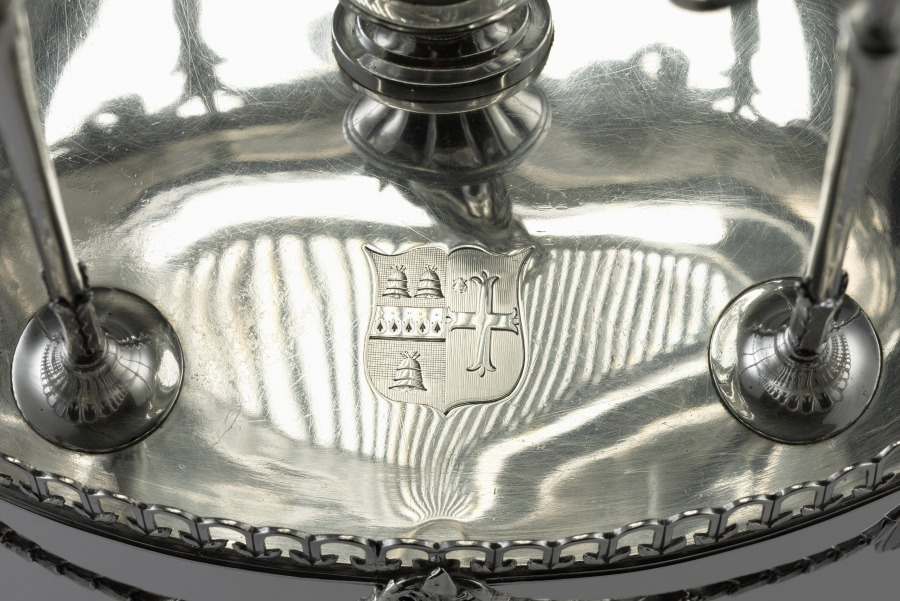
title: Centerpiece (metal stand and glass bowl)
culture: England, 18th century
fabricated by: William Pitts (British)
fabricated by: Joseph Preedy (British)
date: 1792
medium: silver and glass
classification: Silver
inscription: engraved: arms and crest of Bell Coat of arms with Bell impaling Brandling on flat platform.